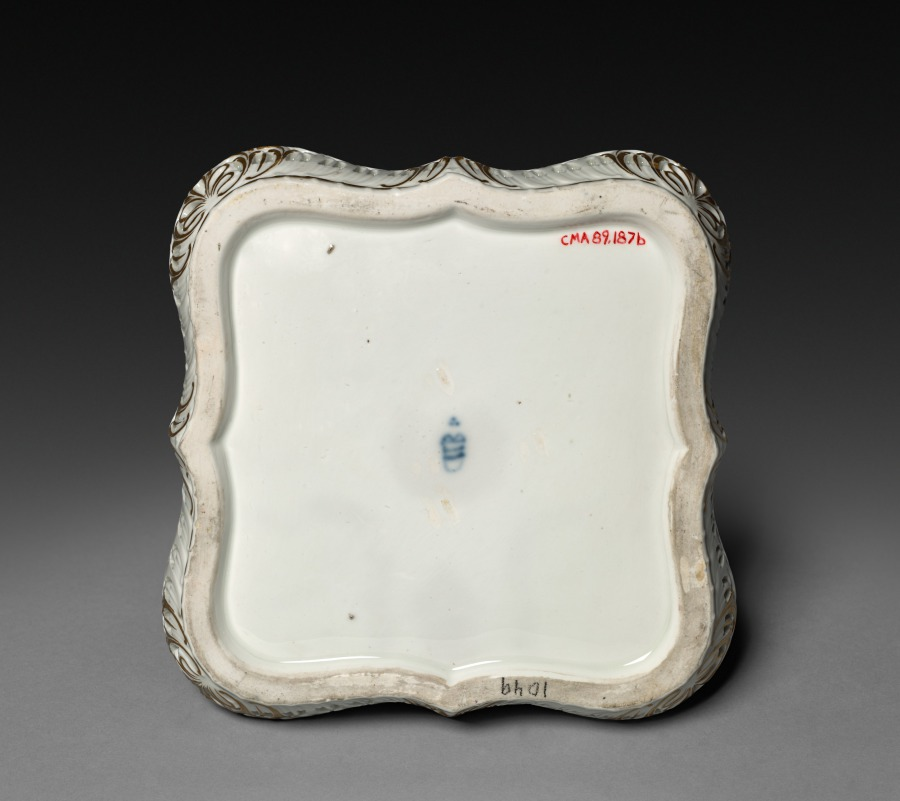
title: Stand for a Cup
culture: Austria, Vienna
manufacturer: Du Paquier Porcelain Manufactory (Austrian, active 1719–1864)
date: c. 1780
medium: porcelain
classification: Ceramic